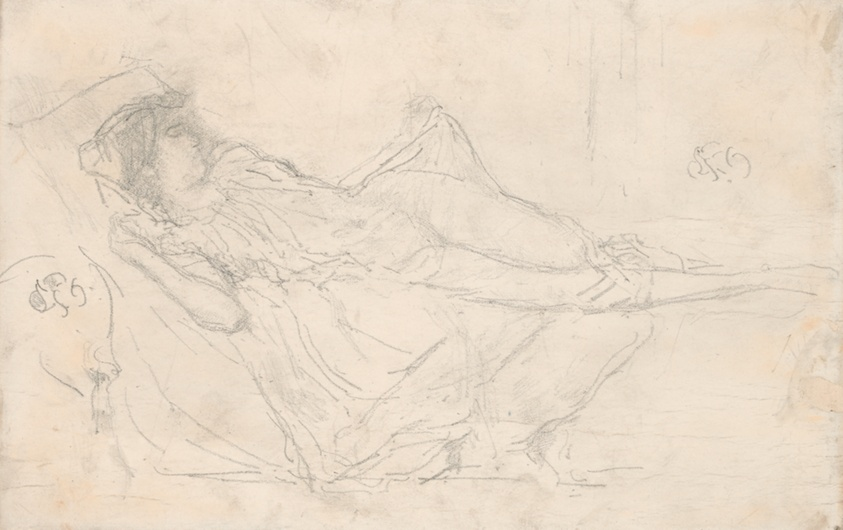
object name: Drawing and Watercolor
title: Reclining Draped Figure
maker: James McNeill Whistler (American, 1834-1903)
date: 1893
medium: Lithographic crayon, with traces of scraping and stumping, on fine-grained transfer paper laid down on cream wove paper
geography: United States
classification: drawings (visual works); prints and drawing; paper